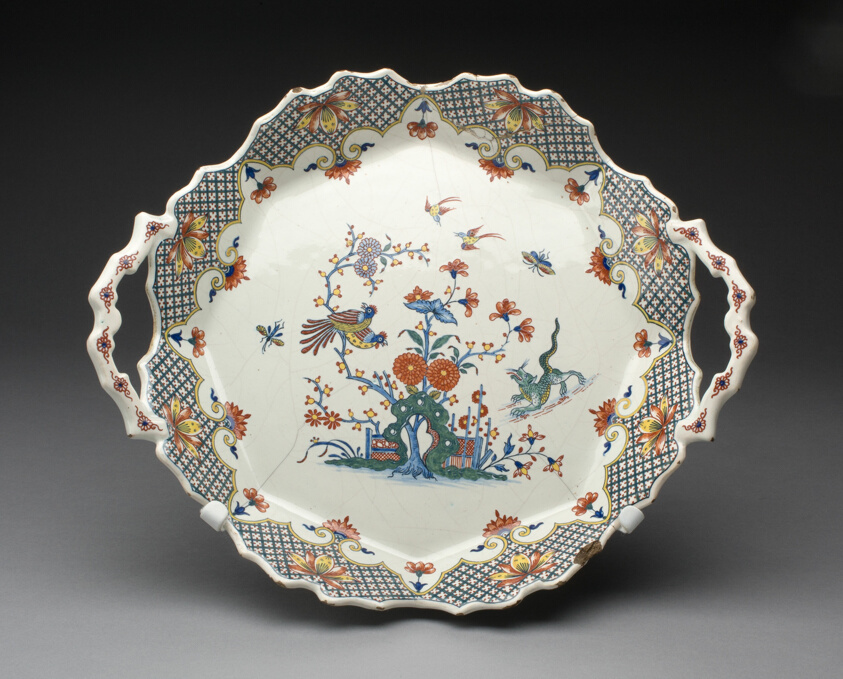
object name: Ceramics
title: Tray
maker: France, Rouen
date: 1725/30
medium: Tin-glazed earthenware (faience) with polychrome enamels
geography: Rouen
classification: tin-glazed ware; earthenware; european decorative arts; ceramics